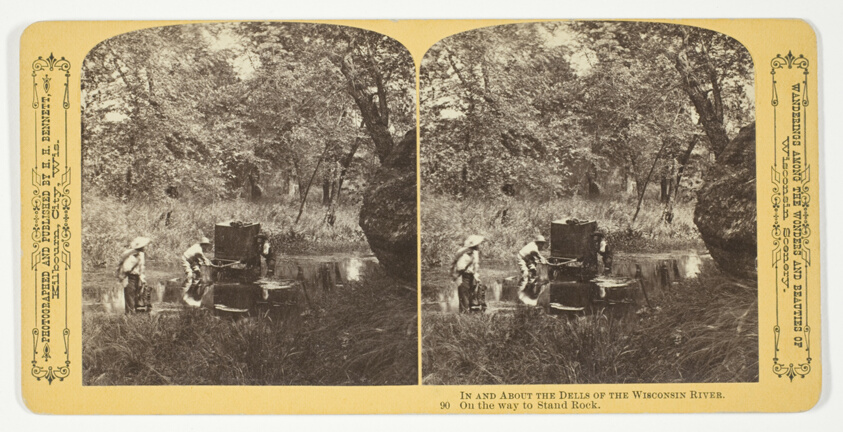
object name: Photograph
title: On the way to Stand Rock, No. 90 from the series "In and About the Dells of the Wisconsin River"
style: 19th century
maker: Henry Hamilton Bennett (American, born Canada, 1843-1908)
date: 1870/1908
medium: Albumen print, stereo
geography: Wisconsin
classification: photography; photograph; albumen silver print; stereograph (albumen)